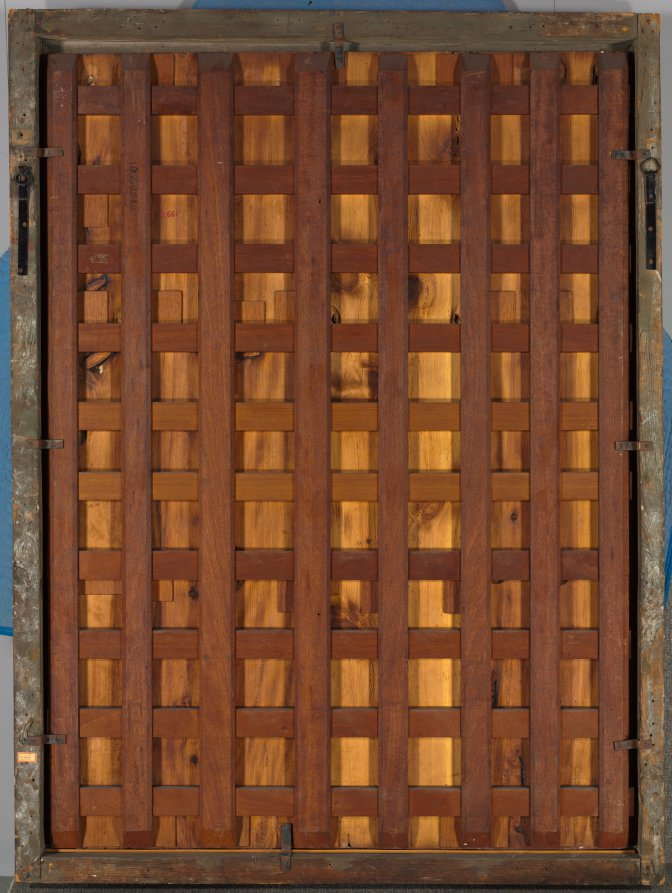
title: The Nativity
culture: Spain, Catalonia, 15th century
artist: Jaume Ferrer the Younger (Spanish, Catalonia died c. 1460/70)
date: c. 1457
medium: oil, tempera, and gold on wood panel (fir)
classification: Painting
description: This painting is believed to be a remaining component of a six-panel altarpiece. The large central panel is now preserved in the Museu National d’Art de Catalunya in Barcelona. Ferrer collaborated with the painter Pere Garcia de Benavarri on this commission. Spanish works like these often feature elaborate treatment of the gold background, evident here in the exuberant raised decoration (called pastiglia) in the haloes. As a symbol of his dominion over the world, Christ holds an orb in his left hand; he bestows a blessing with his right hand. The Virgin kneels above him in rapt adoration. Using the wattle fence almost as a church pew, two shepherds express humble piety; one removes his hat and the other clasps his hands in prayer.